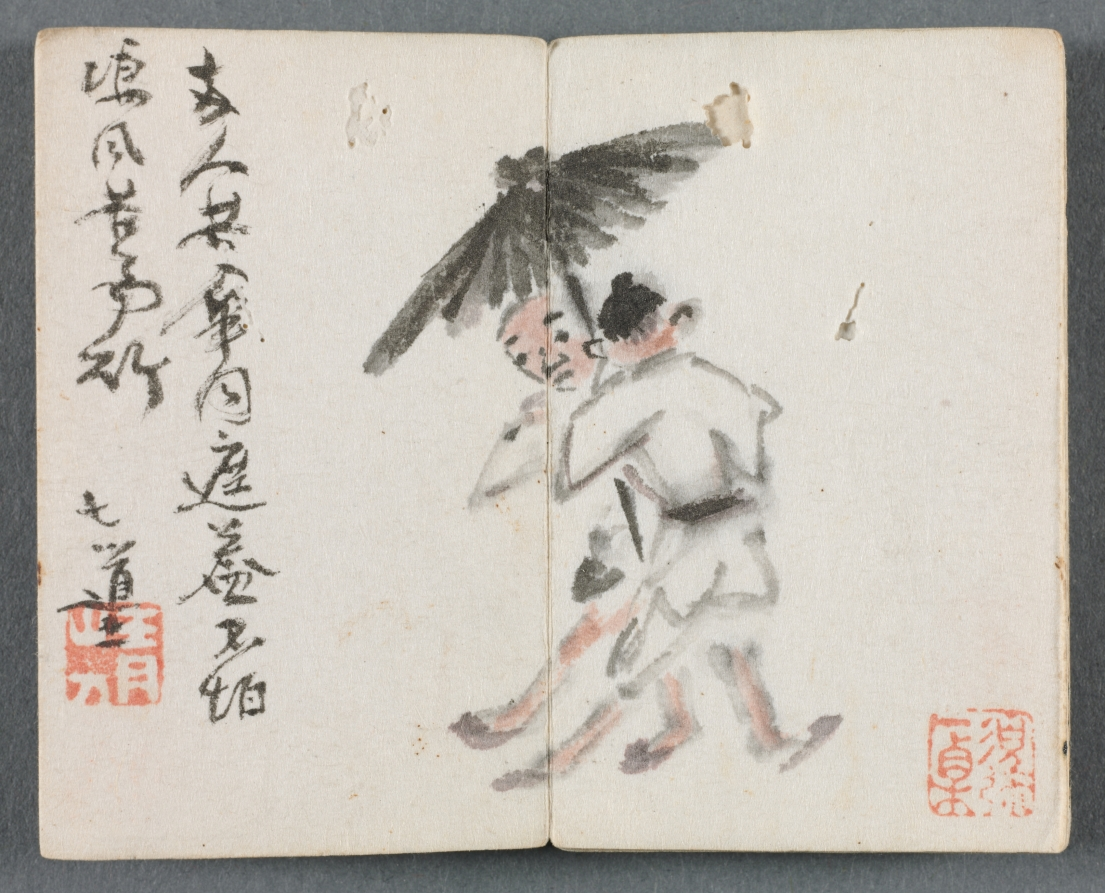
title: Miniature Album with Figures and Landscape (Two Men with Umbrella)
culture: China, Qing dynasty (1644–1911), Qianlong reign (1736–95)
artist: Zeng Yandong (Chinese, c. 1751–1827)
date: 1822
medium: album leaf, ink and color on paper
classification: Painting